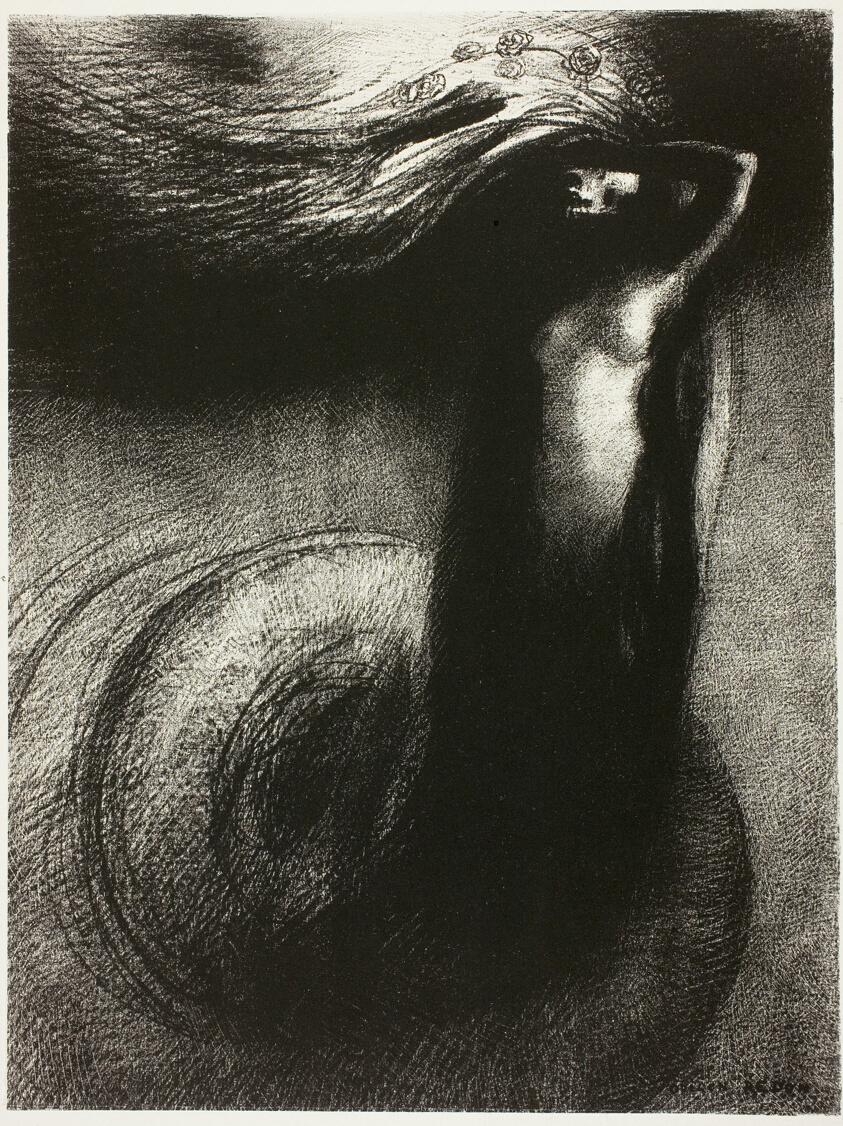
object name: Print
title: Death: "My Irony Surpasses All Others"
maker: Odilon Redon (French, 1840-1916)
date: 1888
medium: Transfer lithograph in black ink on thin ivory wove paper, laid down on heavyweight ivory wove plate paper (chine collé)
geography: France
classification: lithograph; print; prints and drawing; paper